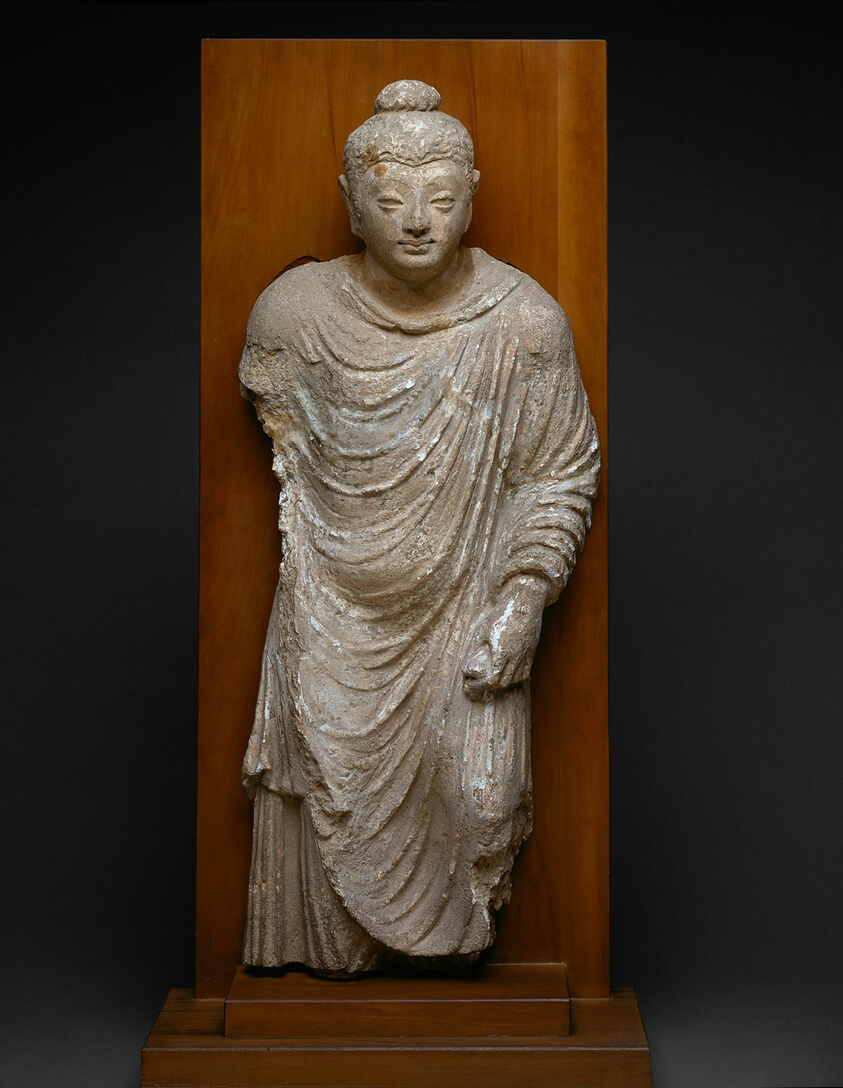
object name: Sculpture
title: Walking Buddha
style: South Asian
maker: Afghanistan or Pakistan; Ancient region of Gandhara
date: Kushan period, 3rd/4th century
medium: Stucco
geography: Gandhara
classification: stuccowork; sculpture; asian art